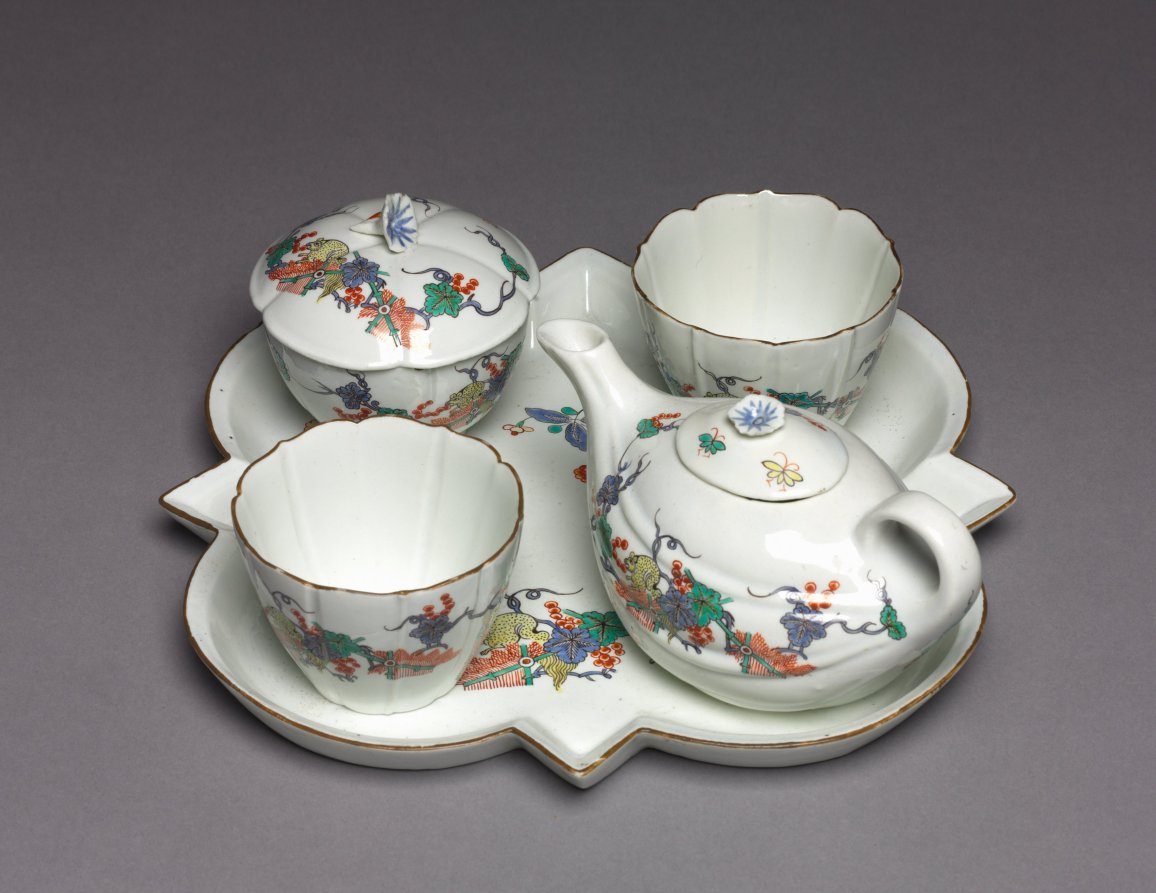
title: Tea Service (Déjeuner)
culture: France, Chantilly, 18th century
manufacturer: Chantilly Porcelain Factory (French)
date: c. 1730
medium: Tin-glazed soft-paste porcelain with enamel decoration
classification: Ceramic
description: This tea service, composed of a teapot, a sugar bowl, two cups, and a tray, is decorated with brightly colored polychrome floral motifs on a milky-white background typical of the Japanese Kakiemon style. The body of the teapot recalls Chinese or Japanese gourd or melon forms while the tray and cups pull inspiration from European silver models.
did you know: The use of knobs in the form of trumpet-shaped blossoms is characteristic of porcelain produced at the Chantilly factory.